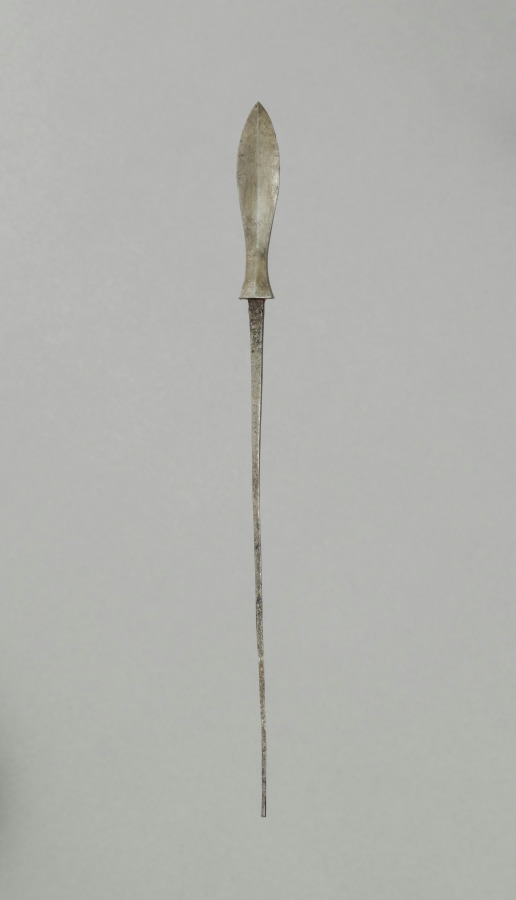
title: Arrow Point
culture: Japan, Edo period (1615–1868)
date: 1700s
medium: steel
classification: Arms and Armor